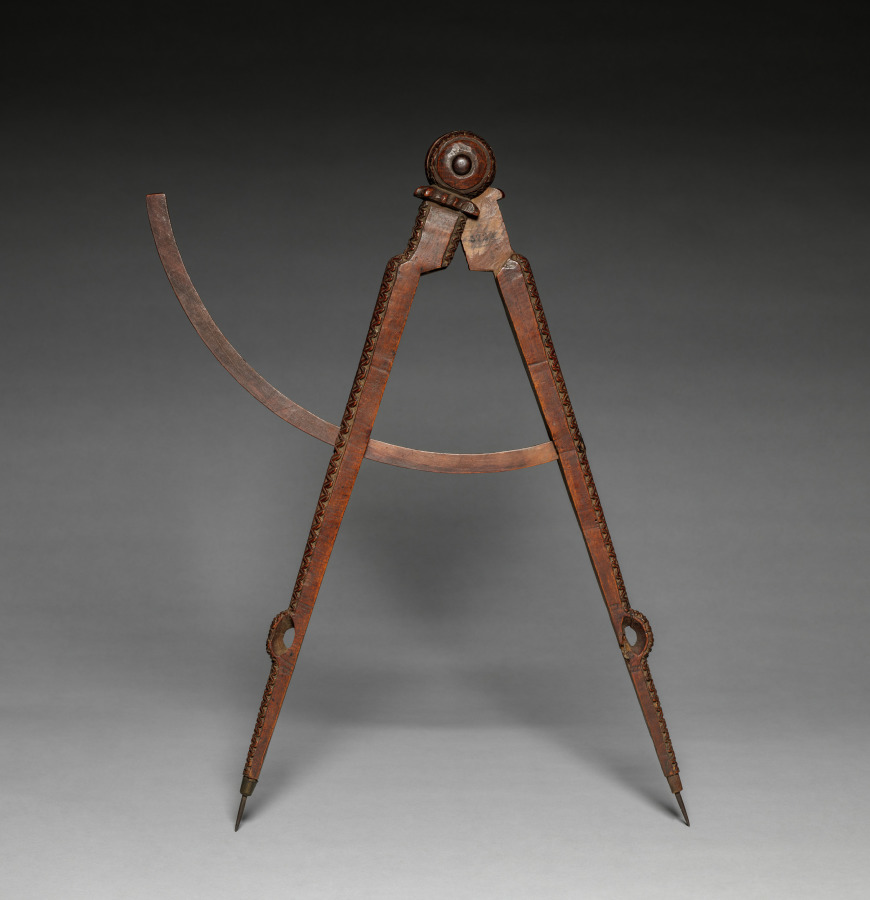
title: Dividers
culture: Scandanavia ?, 17th century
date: 1600s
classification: Tool